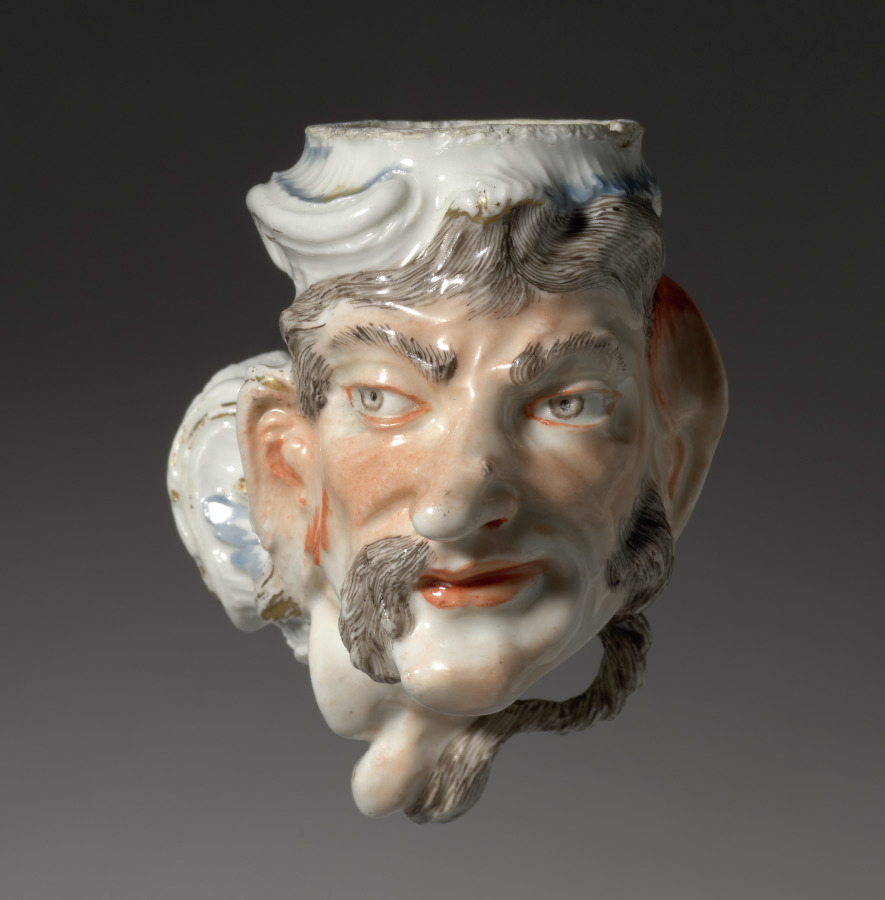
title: Pipe Head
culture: Germany, Nymphenburg, 18th century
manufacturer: Nymphenburg Porcelain Factory (German, founded 1747)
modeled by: Franz Anton Bustelli (Swiss, 1723–1763)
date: mid-1700s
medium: porcelain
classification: Ceramic